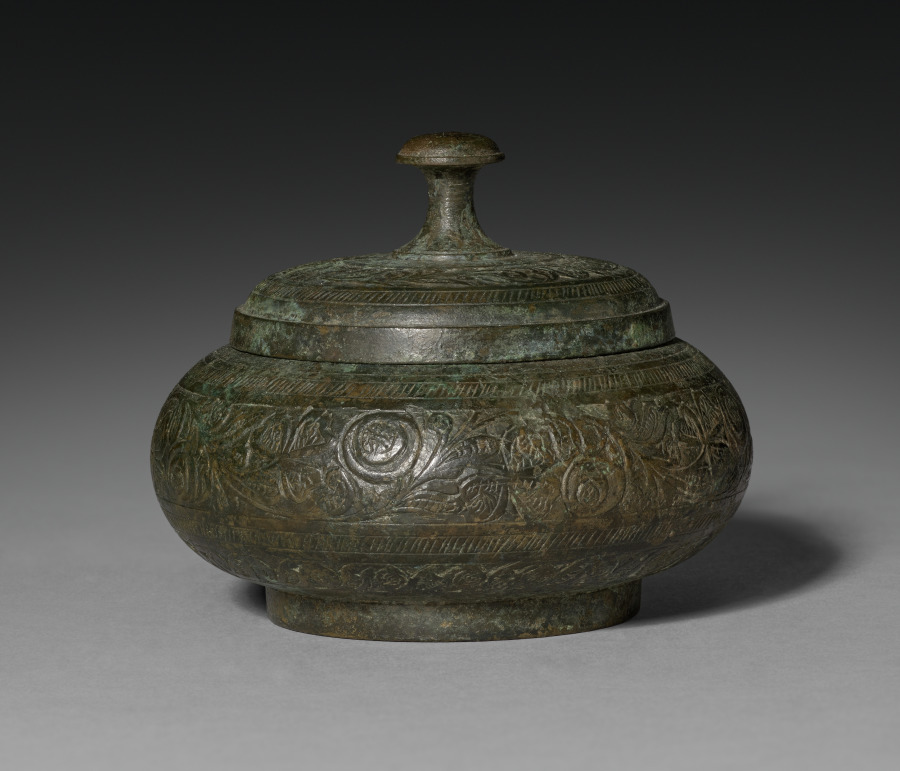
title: Reliquary Box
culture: Pakistan, Gandhara, probably Swat, late Kushan period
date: 200–400 CE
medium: bronze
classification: Metalwork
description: This casket in bronze represents the great variety of reliquary caskets. It is round, has a low foot, and is covered with a lid (with raised handle) that fits over the vessel rather than being inset. It is a traditional shape frequently encountered in Gandharan reliquaries, but its slight flattening and elaborate decoration imply a slightly late date. A central band of a floral creeper decorates the main body of the box and its lid, and is framed on both sides by narrower fluted bands. This type of freehand design is characteristic of the late Kusana-early Gupta period. Similar floral patterns are found in another CMA object (1972.164), the lid of a box showing combat between a man and a lion, which also dates to a later period. There the design fills the vacant areas in the busy composition. This pattern, however, has its antecedents in the Begram ivories . which, according to most sources, pre-date the Sasanian invasion of the mid-third century AD. Therefore, it can be assumed that this type of floral decoration was already in use in the third century and that this reliquary box probably dates to the third-fourth century AD. The bronze alloy, in its somewhat silverish-metallic appearance, seems to be very close to the material used in the Swat bronzes, which suggests that Swat may also be the provenance for this reliquary.